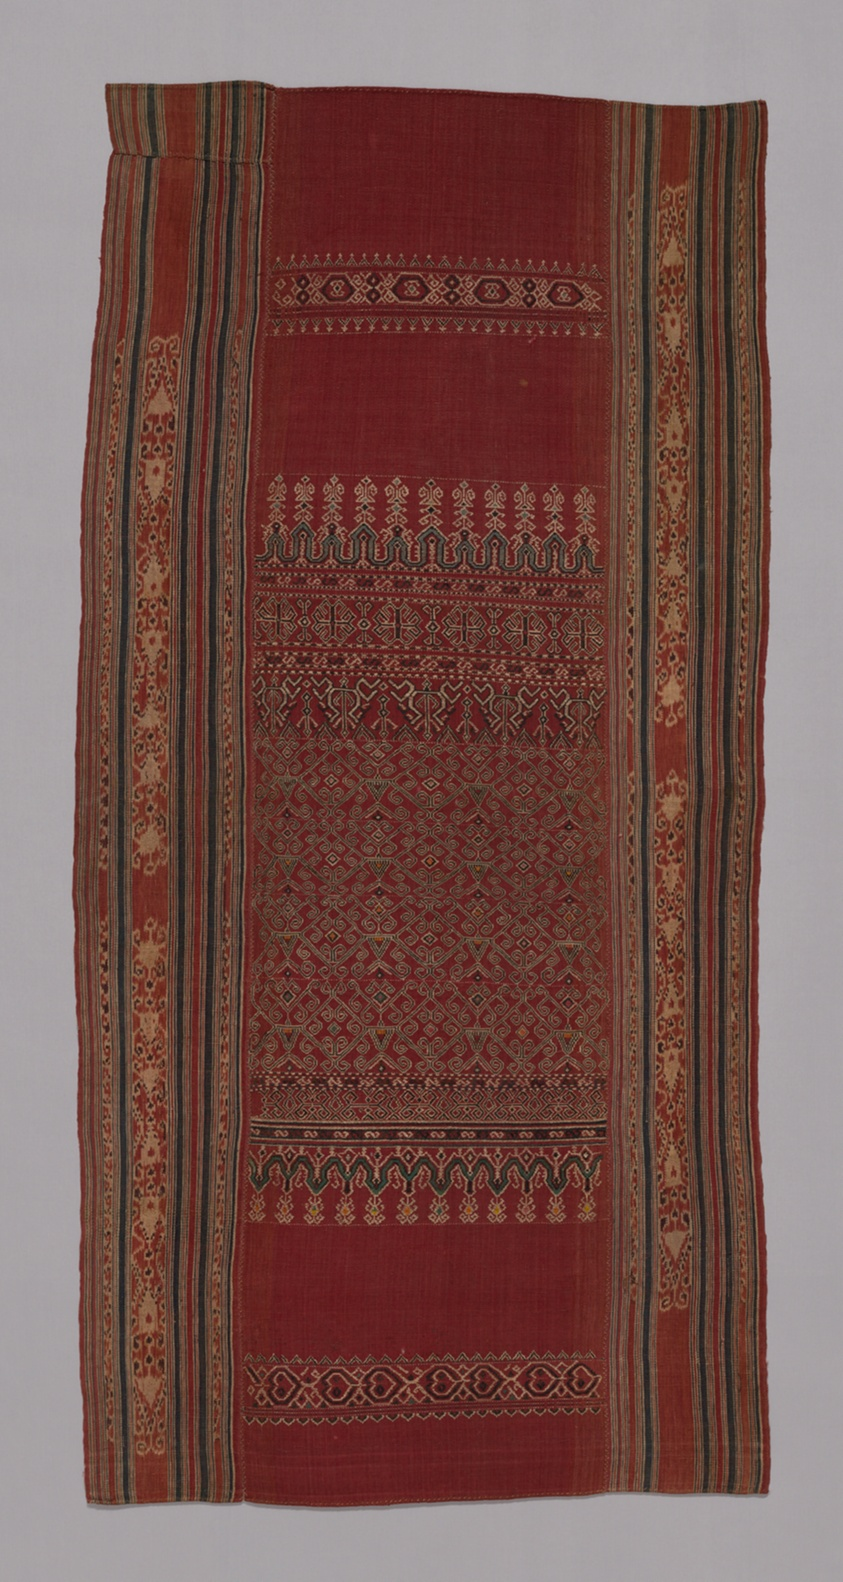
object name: Religious/Ritual Object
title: Ceremonial Cloth (Pua sungkit)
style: indonesian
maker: Iban (Indonesia, Borneo, Sarawak)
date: 19th century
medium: Three panels joined: Side panels: cotton, stripes of plain weave and of warp resist dyed (warp ikat) plain weave; Center panel: cotton, plain weave with supplementary patterning and brocading and twining wefts and supplementary wrapping elements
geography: Indonesia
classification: textile; weaving - printed; ritual objects